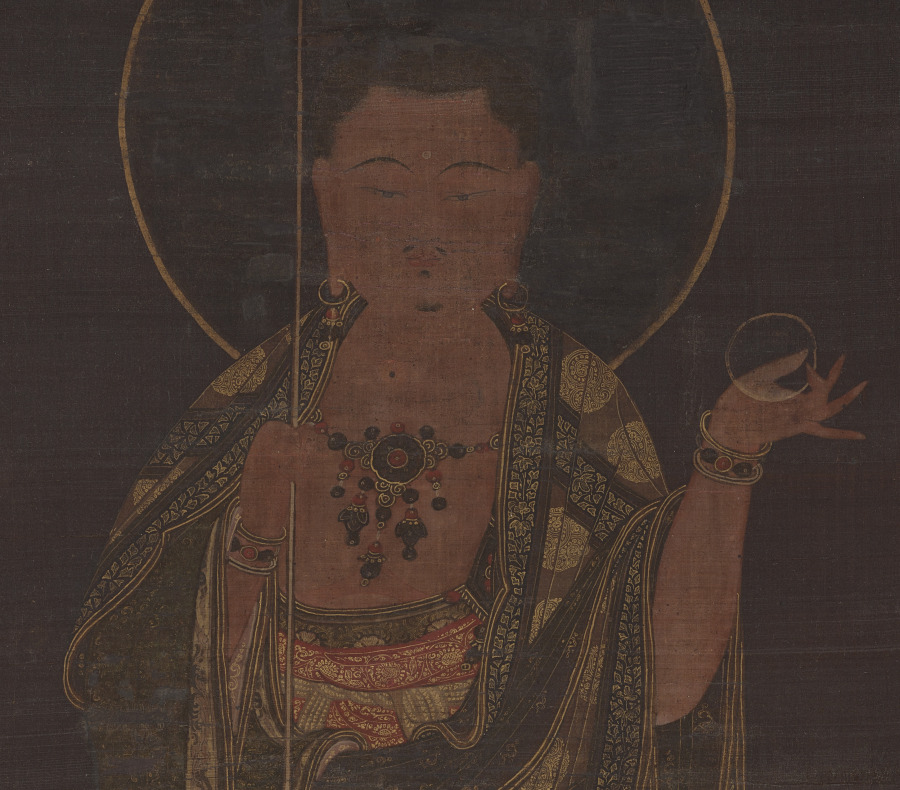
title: Standing Ksitigarbha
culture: Korea, Goryeo dynasty (918–1392)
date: 1300–1350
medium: Hanging scroll; ink, color, and gold on silk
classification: Painting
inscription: 青龍公用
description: This fourteenth-century hanging scroll depicts Kṣitigarbha (지장보살), the Bodhisattva of Salvation in the guise of a youthful Buddhist monk. Clad in simple monastic robes, he holds a staff to announce his presence and a wish-fulfilling jewel symbolizing his vow to relieve suffering. Kṣitigarbha is believed to descend into the underworld to guide and liberate tormented souls trapped in purgatory. His compassionate mission made him a key figure in both East Asian visual and ritual tradition.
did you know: Only 10 of the 14th-century paintings of Ksitigarbha are known to exist in the world today. This is one of these rare surviving masterpieces.